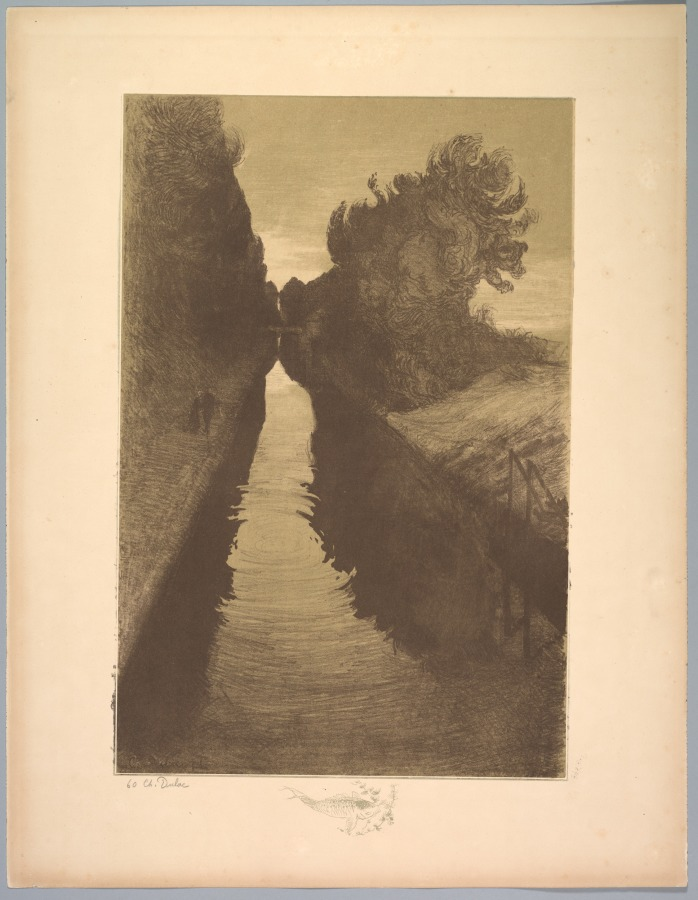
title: Suite de Paysages: Landscape, Plate 1, Remarque, A Fish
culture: France, 19th century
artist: Charles Marie Dulac (French, 1865–1898)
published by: Printer: Distribué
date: 1892–93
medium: color lithograph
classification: Print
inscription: Below image, left, in graphite: 60 Ch. Dulac In plate, within image: Ch. Dulac On colophon: Planche I (Imprimeur Distribué)